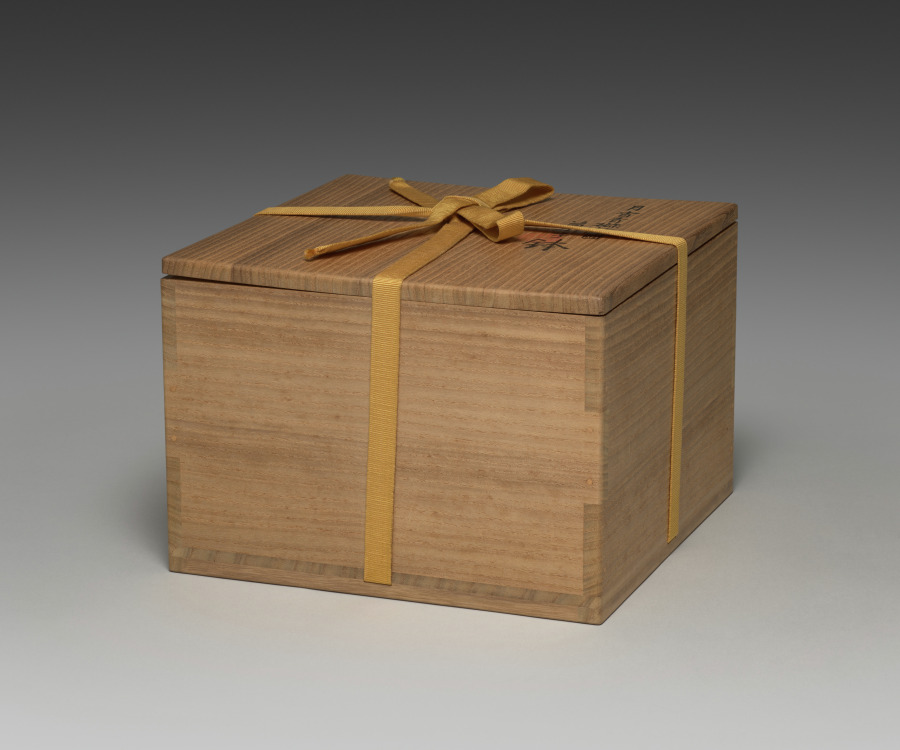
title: Sweets Bowl with Plum Tree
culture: Japan, Taishō period (1912–26) to Shōwa period (1926–89)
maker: Seifū Yohei IV (Japanese, 1872–1951)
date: 1914–46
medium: Porcelain with underglaze color and modeled design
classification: Ceramic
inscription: 清風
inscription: 清風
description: In Chinese culture, the plum symbolizes the virtue of perseverance. For his sweets bowl based on Qing dynasty (1644–1911) Chinese prototypes, Seifū Yohei IV first painted the gnarled boughs of a plum tree in iron oxide on the surface. Then he made the tree’s blossoms slightly raised by building up slip, or liquified clay. He painted their centers yellow. Before applying the blue glaze, he covered the blossoms with paper so that they remained white.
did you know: Broad access to high-quality Chinese ceramics occasioned by the collapse of the Qing dynasty (1644–1911) and the dispersal of elite Chinese collections presented Seifū Yohei IV with models for both molded decoration and painted motifs.